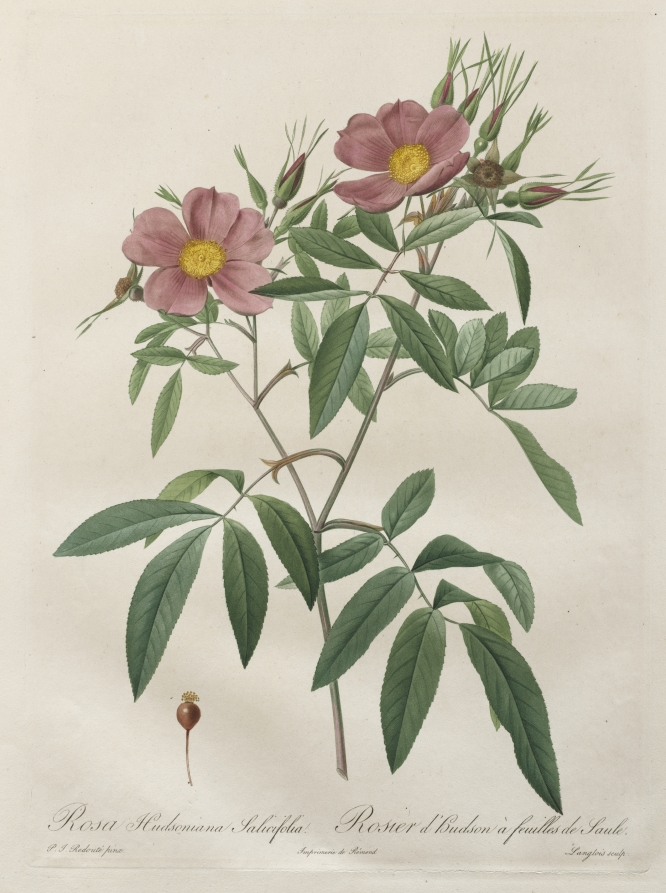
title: Les Roses: Rosa Hudsoniana Salicifolia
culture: France, 19th century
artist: Pierre-Joseph Redouté (French, 1759–1840)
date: 1817–24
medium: stipple and line engraving, with hand coloring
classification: Print